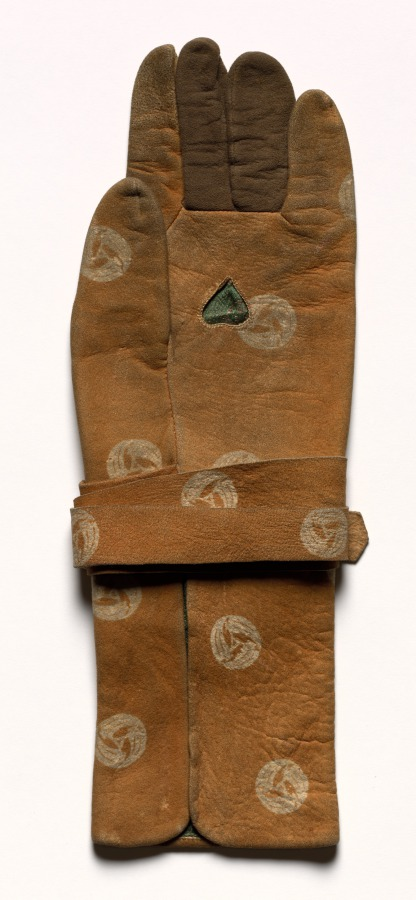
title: Archer's Glove (left)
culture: Japan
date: 1800s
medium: chamois leather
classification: Garment